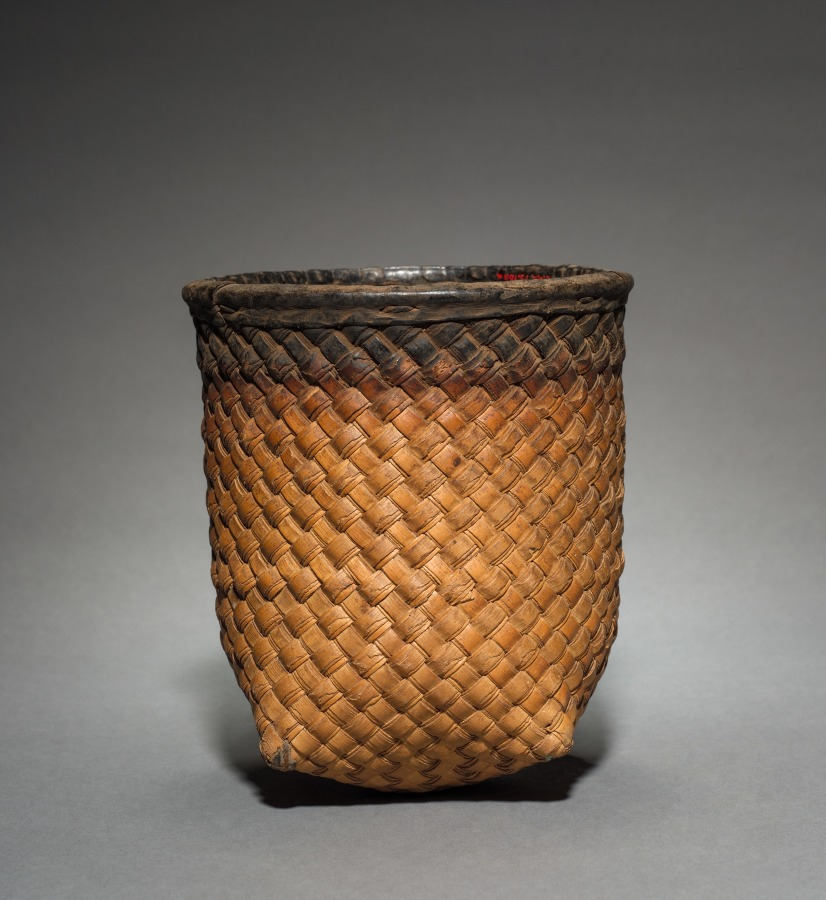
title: One of Ten Nesting Wedding Baskets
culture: Africa, Western Sudan, Burkina Faso, Lobi, 20th century (?)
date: c 1900s ?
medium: Plant fiber and leather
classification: Vessels